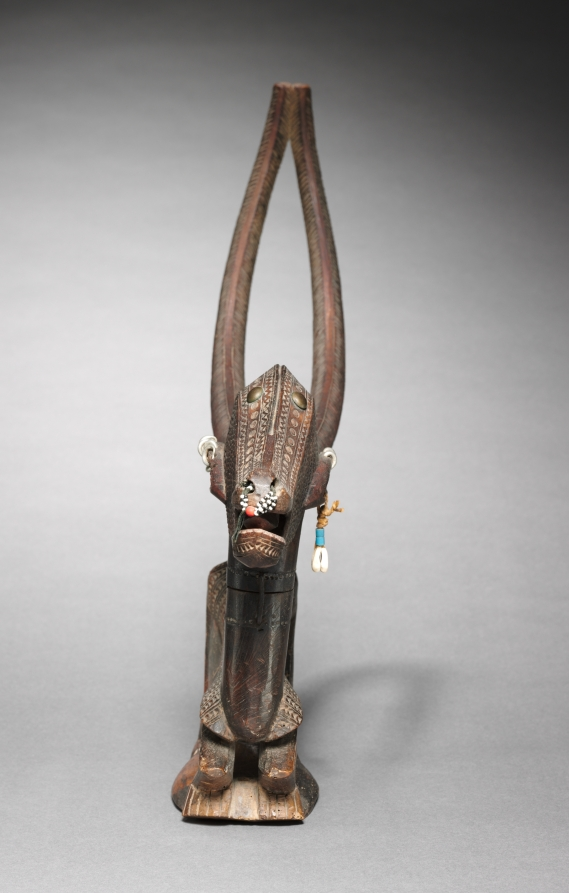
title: Headdress (chi wara)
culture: Africa, West Africa, Mali, Bamana-style blacksmith-carver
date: early to mid-1900s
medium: Wood, cowrie shells, glass beads, possibly aluminum, iron alloy, upholstery studs, and natural fibers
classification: Mask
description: Chi wara—a mythical “farming beast”—was said to teach farming to the Bamana people. Carved patterns cover this female chi wara’s body, highlighting its muscles and emphasizing that it is no earthly animal, but rather an agricultural spirit that combines human, antelope, and anteater elements. This example wears earrings and a nose ring of imported metals and beads. Its carver—a blacksmith—used a naturalistic style common south of the city of Bamako. Accompanied by women’s songs, male performers danced paired male-and-female chi wara headdresses affixed to basketry caps at agricultural competitions and weddings.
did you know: Chi wara headdresses look different depending on the region they were made in. The style of this example tells us it was likely made in the Djitoumou region of southern Mali.